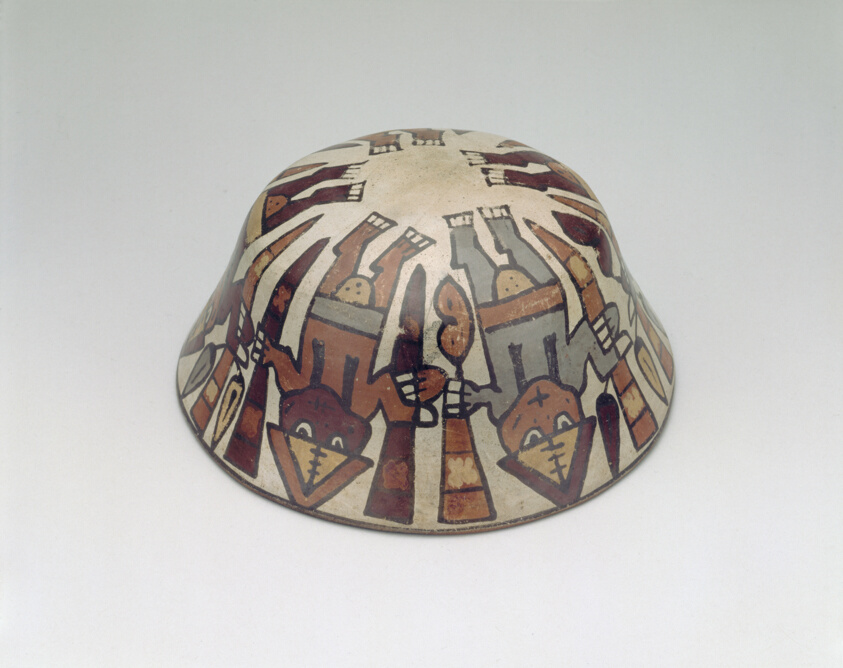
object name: Vessel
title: Bowl Depicting a Harvest Dance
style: nazca, early intermediate period, Pre-Columbian, americas, andes, Arts of the Americas, andean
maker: Nazca; South coast, Peru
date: 180 BCE–500 CE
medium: Ceramic and pigment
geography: Peru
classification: bowl; earthenware; art of the americas; ceramics; vessel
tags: people, landscapes, agriculture, ritual